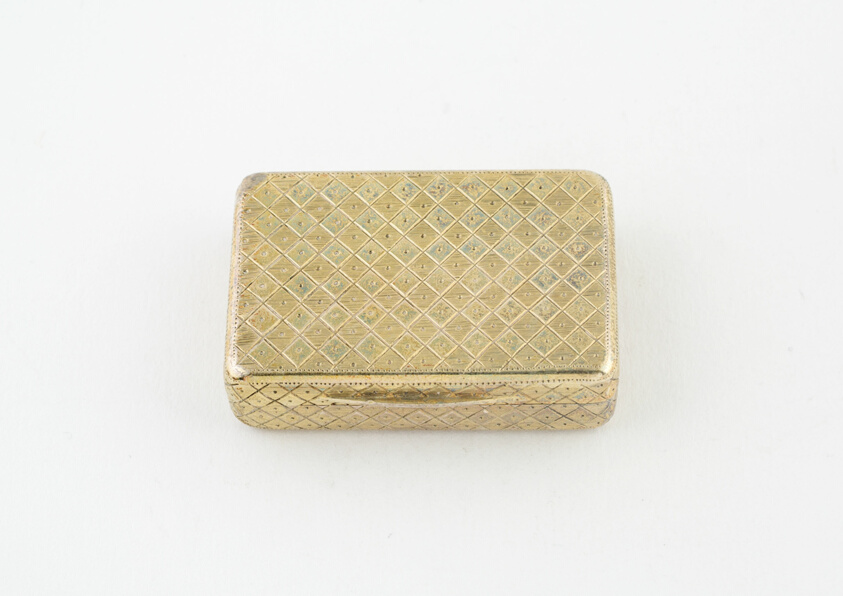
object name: Metalwork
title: Vinaigrette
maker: T. Phipps and E. Robinson (London, England)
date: c. 1800/01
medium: Silver gilt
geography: London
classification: vinaigrette (container for health care); container for personal use; box; european decorative arts; metalwork; silver; decorative object/ornament